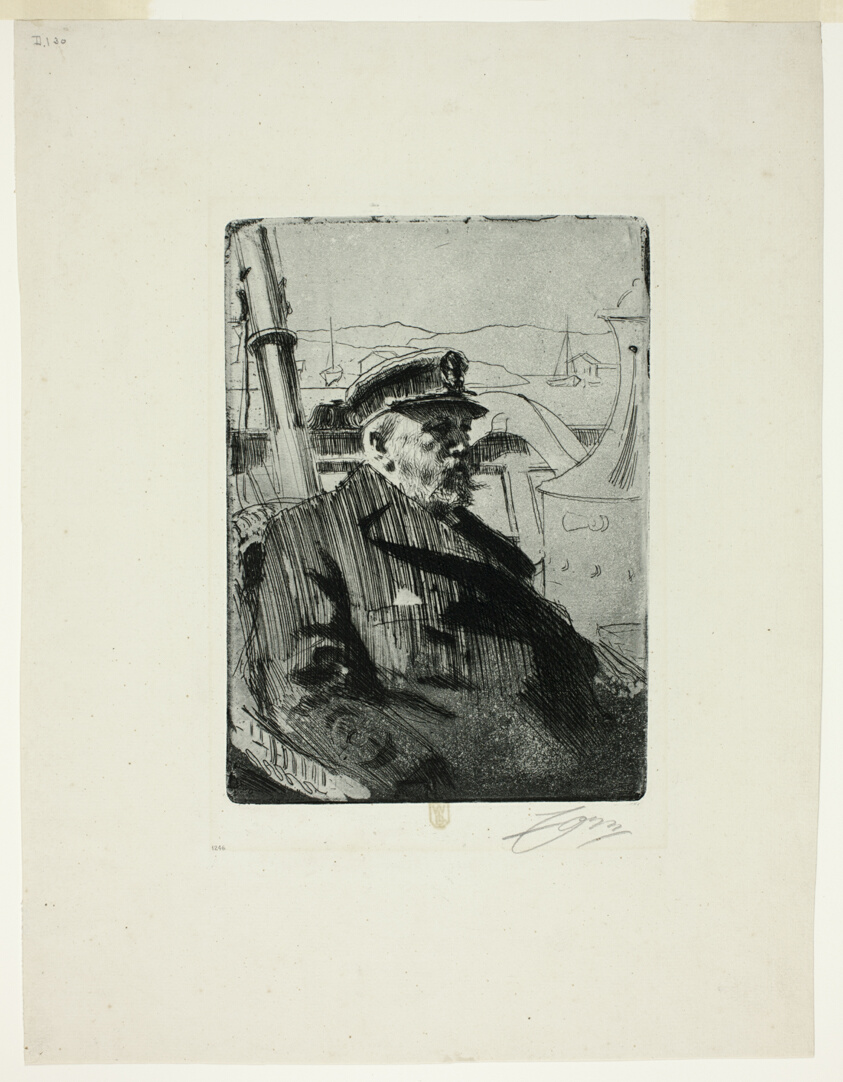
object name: Print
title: King Oscar II (Second plate)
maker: Anders Zorn (Swedish, 1860-1920)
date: 1898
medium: Etching on ivory laid paper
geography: Sweden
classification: etching; print; prints and drawing